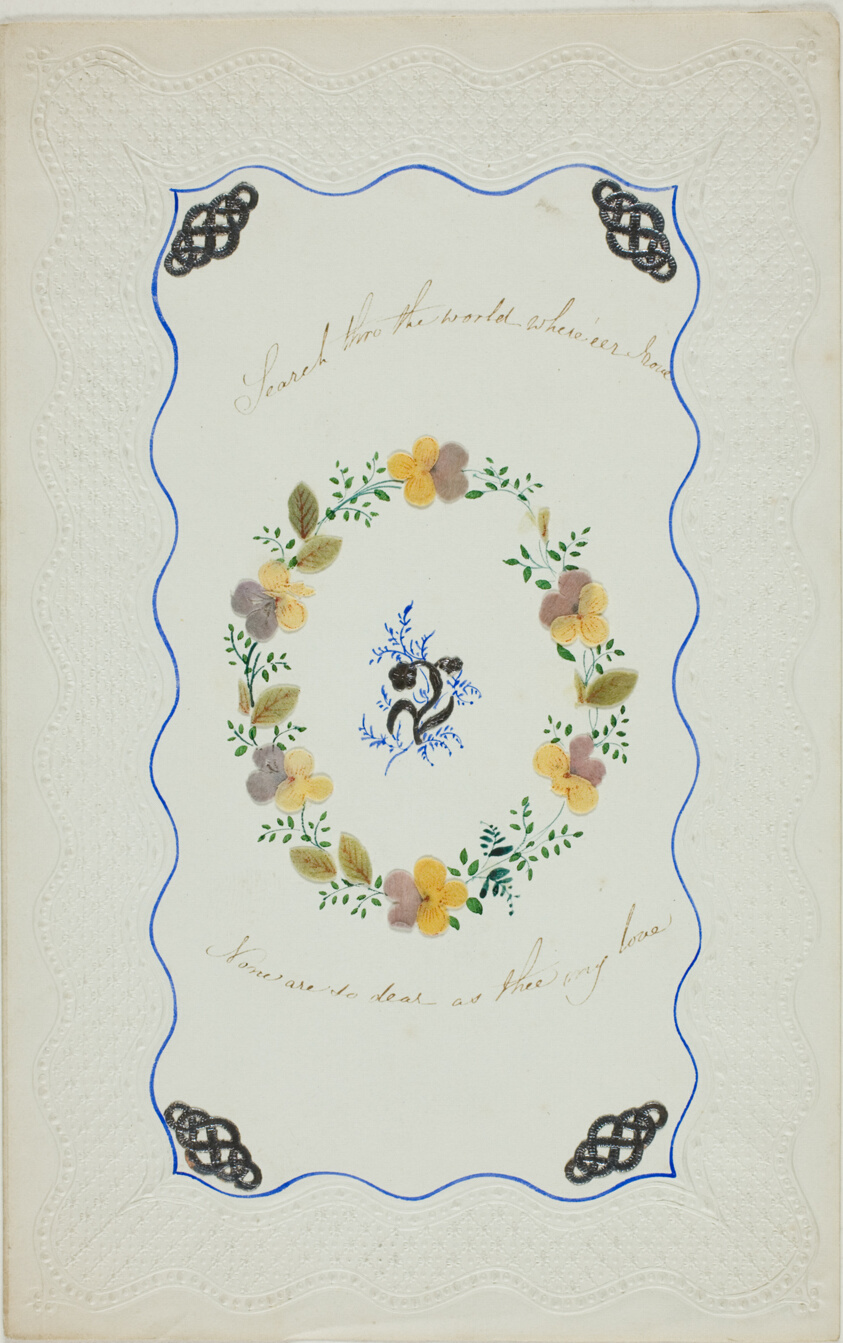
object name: Drawing and Watercolor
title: Search Through the World (valentine)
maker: Unknown Artist; English, 19th century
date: c. 1850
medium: Collaged elements and watercolor, with pen and brown ink on embossed ivory wove paper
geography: England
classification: valentine; prints and drawing; paper